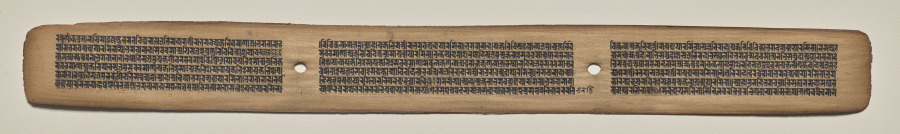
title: Text, Folio 68 (recto), from a Manuscript of the Perfection of Wisdom in Eight Thousand Lines (Ashtasahasrika Prajnaparamita-sutra)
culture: Eastern India, Bihar, Vikramashila Monastery. Painting: Nepal, Kathmandu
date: Sunday, September 14, 1119 (year 239 of the Newar Samvat in the month of Ashvina)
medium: gum tempera and ink on palm leaves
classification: Painting